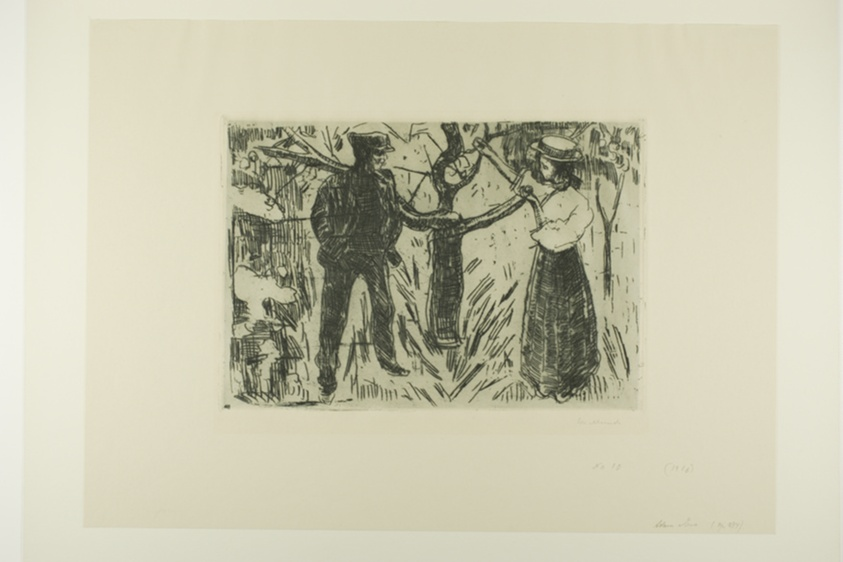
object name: Print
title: Adam and Eve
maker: Edvard Munch (Norwegian, 1863-1944)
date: 1915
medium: Etching on paper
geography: Norway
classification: etching; print; prints and drawing